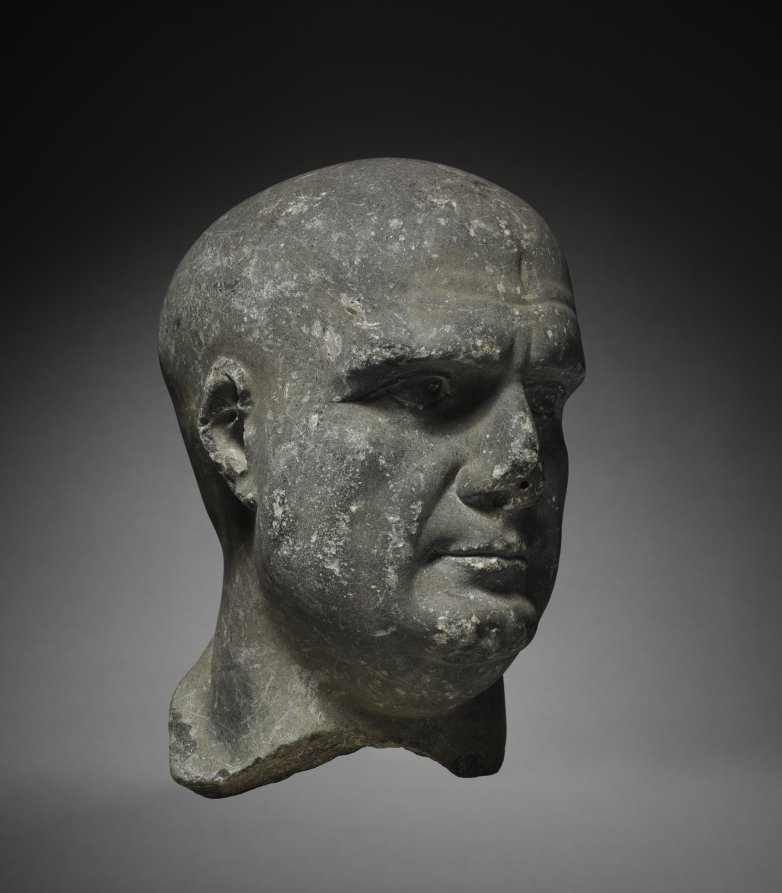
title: Portrait Head of a Priest of Isis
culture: Italy, Roman style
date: 100–200 CE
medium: limestone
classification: Forgery